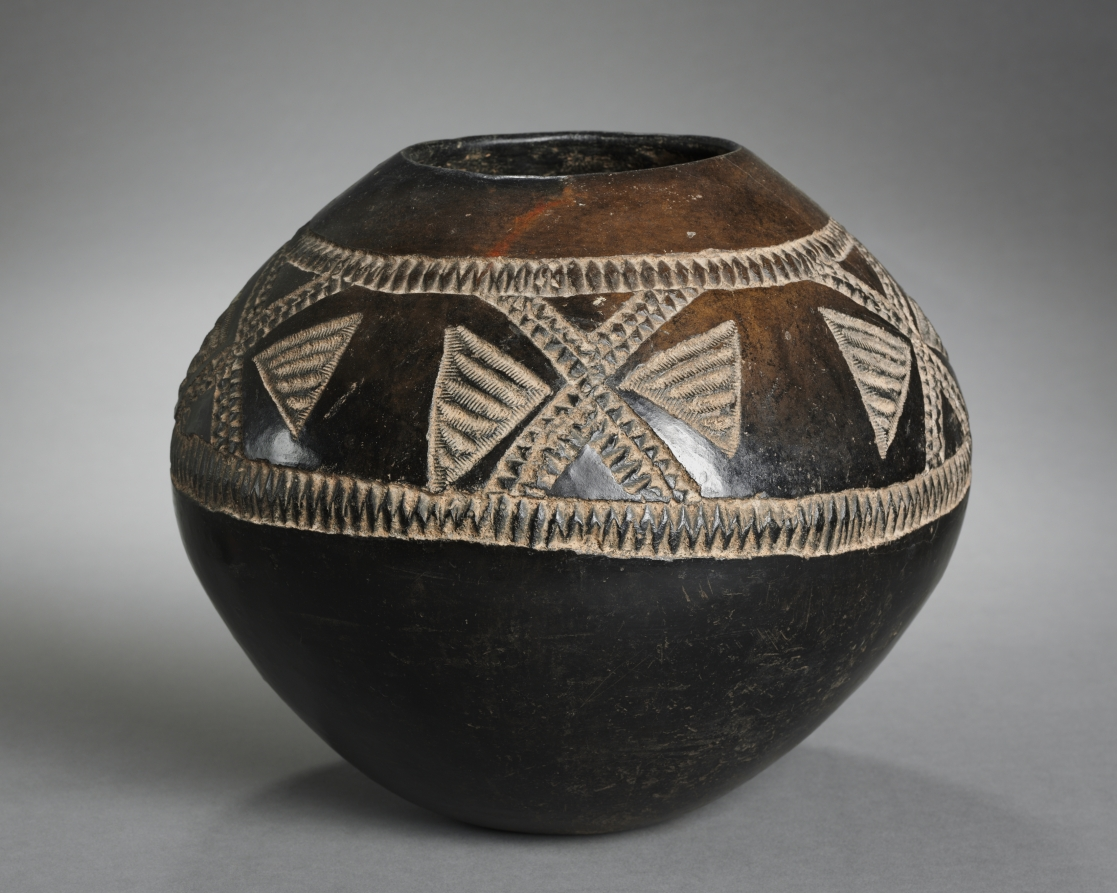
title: Pot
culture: Southern Africa, South Africa, Zulu-style potter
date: 1900s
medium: Terracotta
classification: Vessels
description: Within the Zulu culture (the Northern Nguni tribe), the making of beer pots is the traditional function of women. A potter will travel far searching in riverbeds or for anthills that can supply the correct clay for the vessels. Formed using the coil technique and smoothed using flattened stones, the pots are fired in a dug-out earthen "kiln," and covered with palm leaves, whose oil results in the blackened, shiny texture of the vessels. Years of use deepen this texture to a rich woody patina.